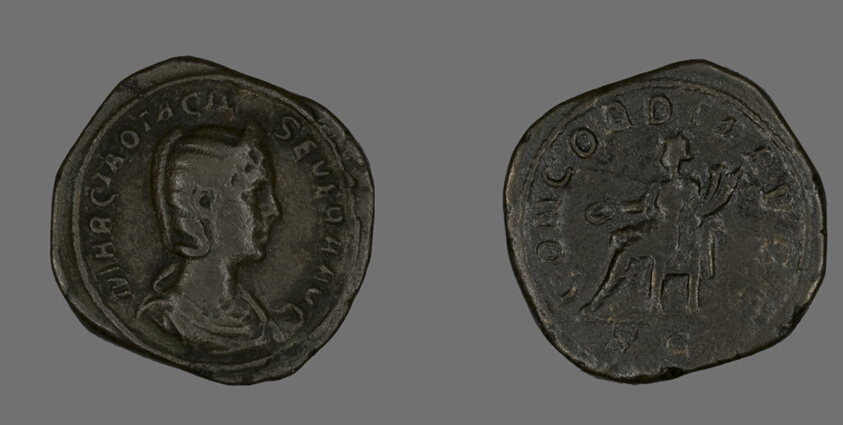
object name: Coin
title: Sestertius (Coin) Portraying Empress Marcia Otacilia Severa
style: roman (ancient, style or period), ancient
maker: Roman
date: 244-249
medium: Bronze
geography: Roman Empire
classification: coin; ancient art